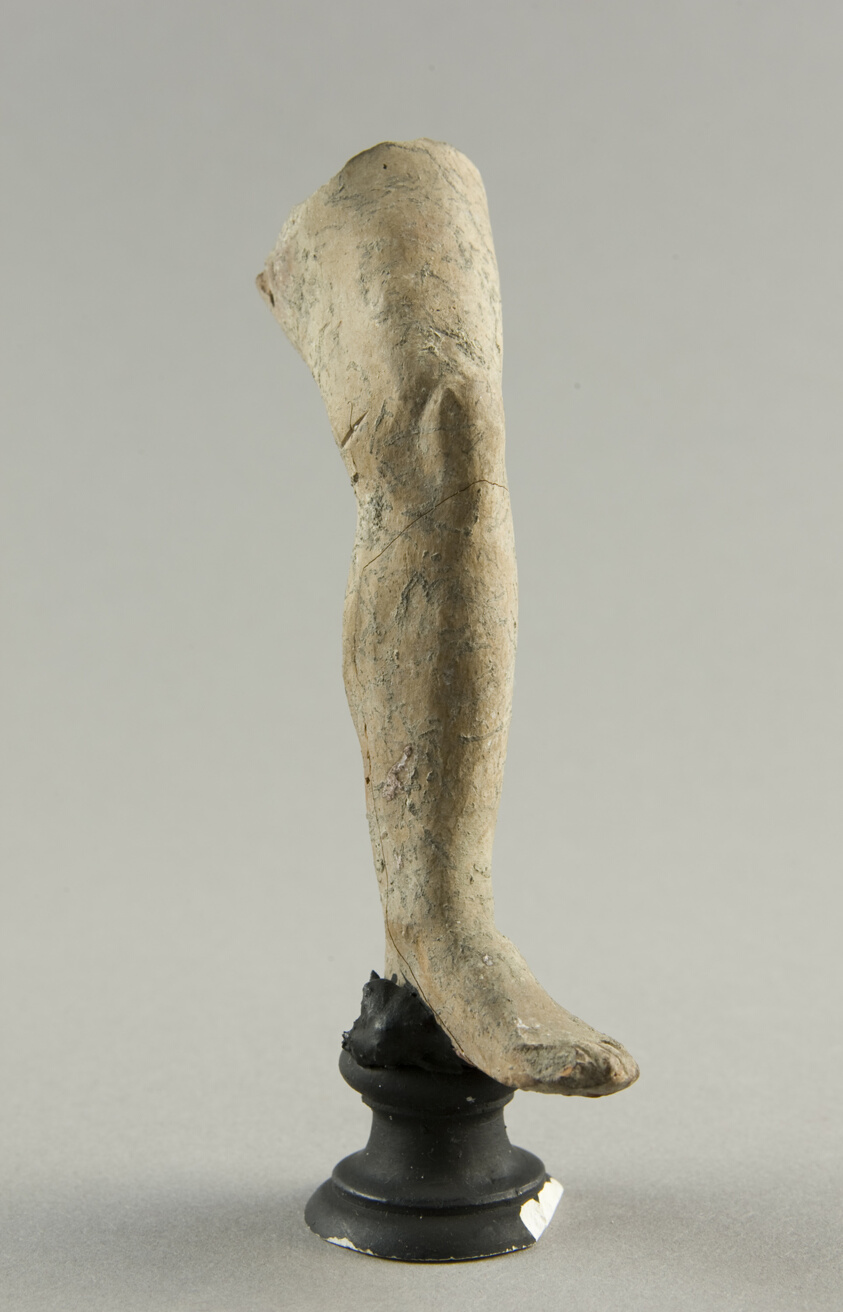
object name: Sculpture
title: Left Leg Broken at Mid-Thigh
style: greek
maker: Greek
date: 4th-3rd century BCE ?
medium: terracotta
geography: Greece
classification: earthenware; ceramics; sculpture; ancient art